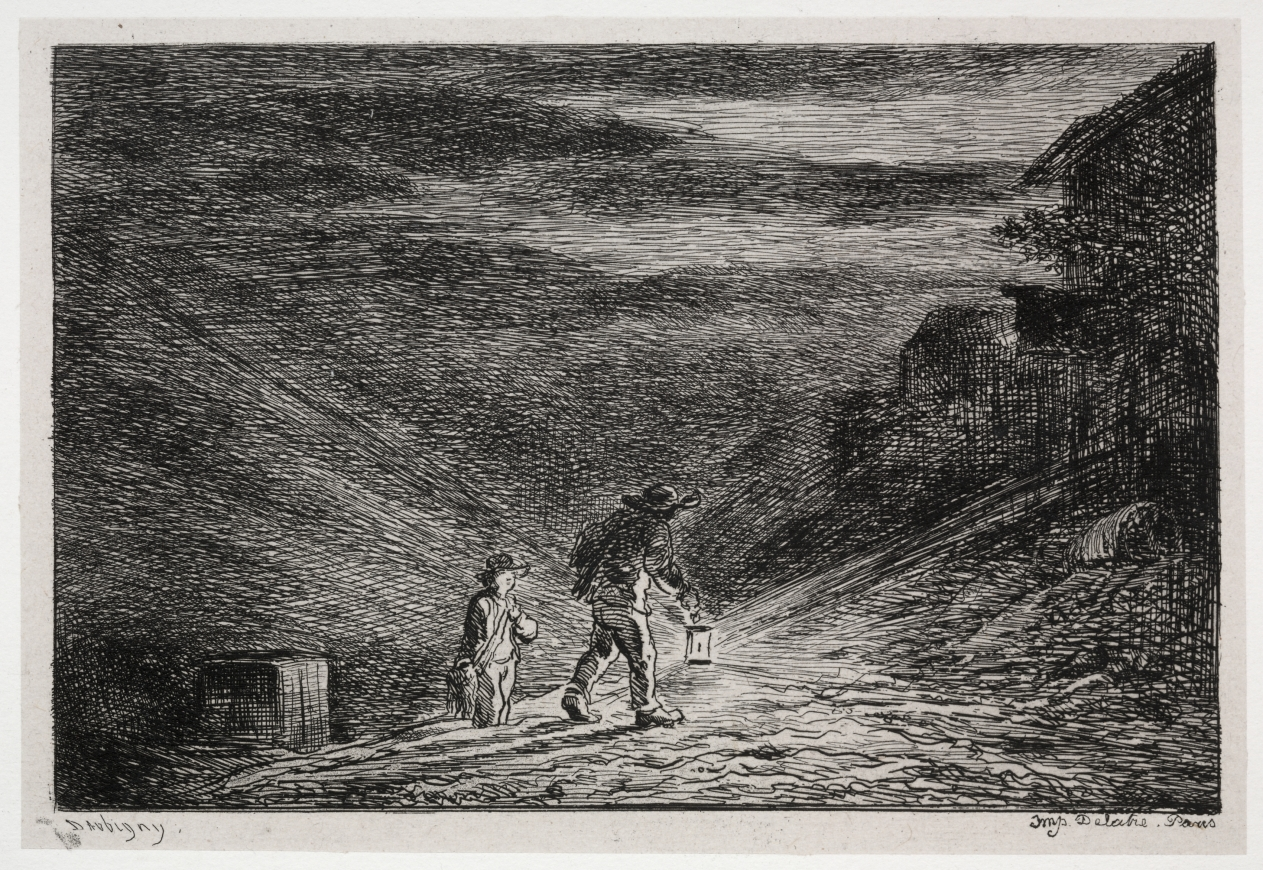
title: The Boat Trip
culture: France, 19th century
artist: Charles François Daubigny (French, 1817–1878)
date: 1861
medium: 16 etchings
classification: Portfolio